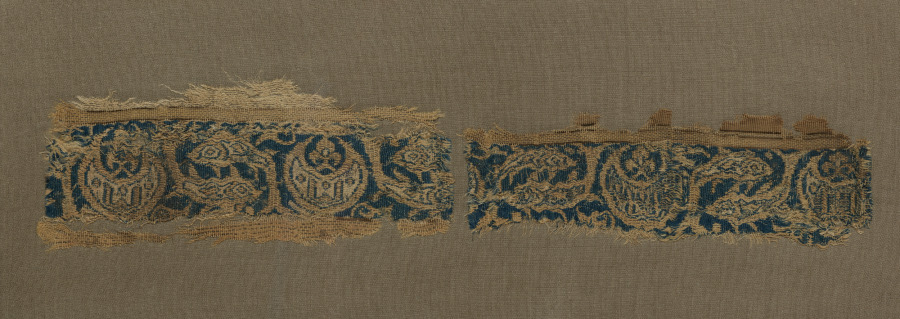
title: Fragment of a Band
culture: Egypt or Syria, Mamluk period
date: 1300–1350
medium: compound tabby, double cloth, and bands of extended tabby; silk and gold filé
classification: Textile